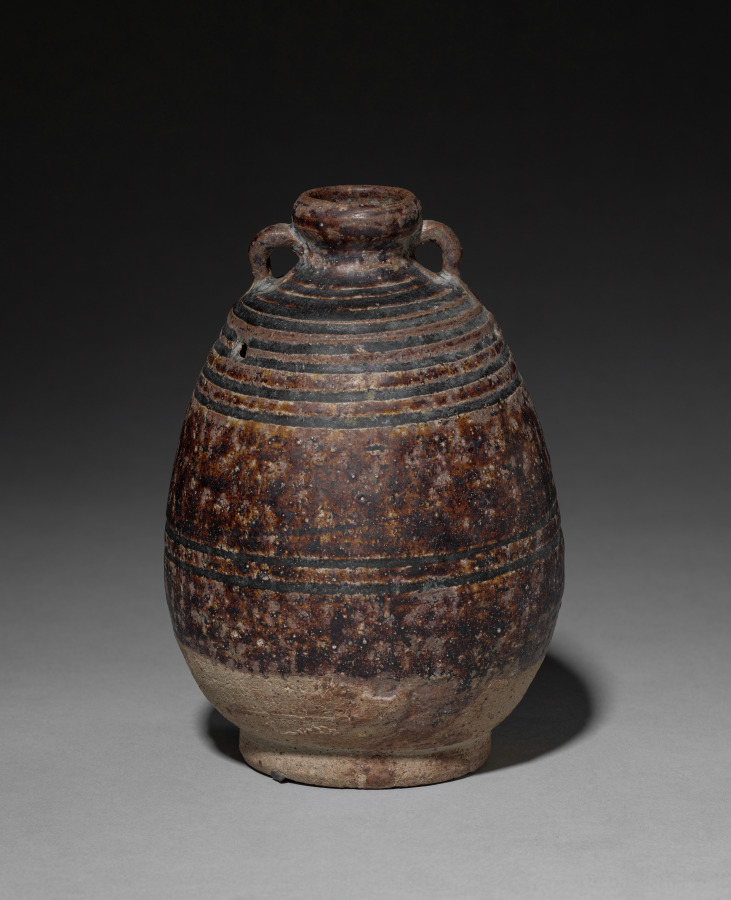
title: Bottle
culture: Siam, Sawankhalok ware, late 13th-14th Century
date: late 1200s-1300s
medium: stoneware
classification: Ceramic